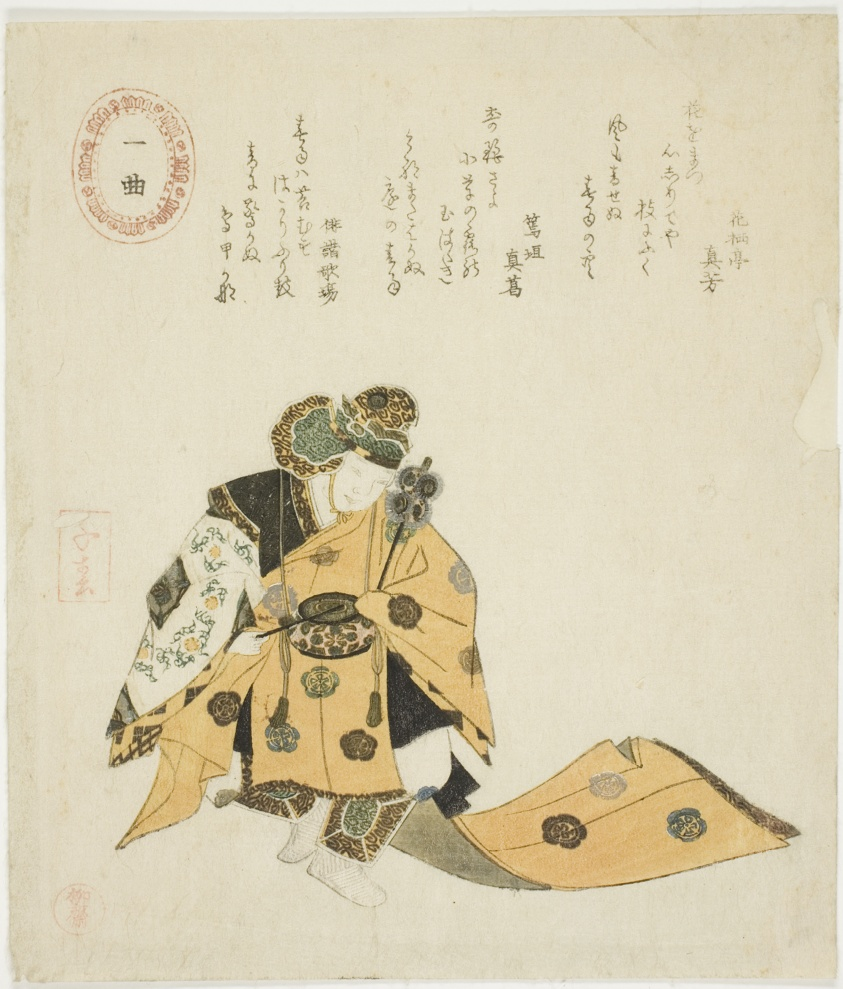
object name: Print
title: Ikkyoku, from an untitled series of No plays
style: Japanese (culture or style)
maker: Takashima Chiharu (Japanese, 1777-1859)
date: 1823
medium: Color woodblock print; shikishiban, surimono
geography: Japan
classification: woodblock print; print; asian art